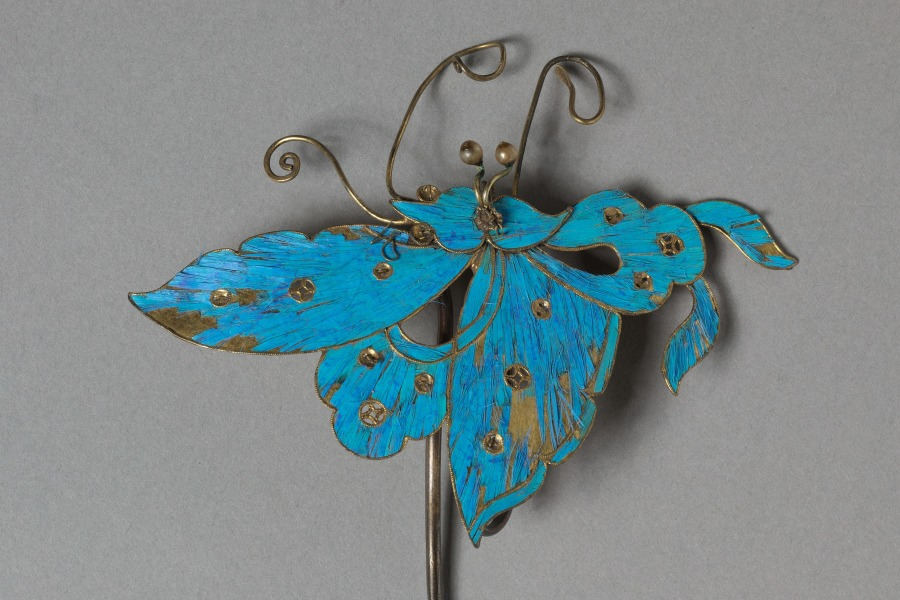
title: Headdress Ornament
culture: China, Qing dynasty (1644-1911)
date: 1800s–1900s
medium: Copper-silver alloy, gilding, kingfisher feathers, glass beads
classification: Jewelry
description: Hair ornaments depicting flowers, butterflies, or birds were worn by ladies of the Manchu elite class.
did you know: The iridescent blue feathers of kingfisher birds are inlaid in hairpins and headdresses.